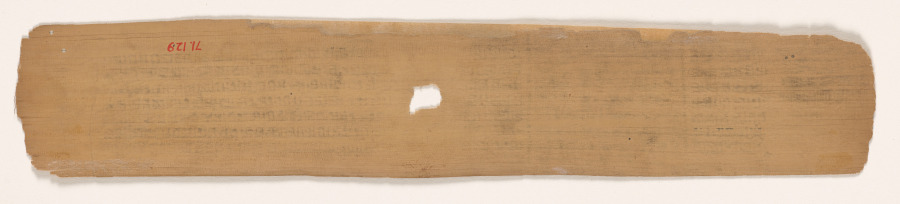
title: Rishabha enthroned, folio 1 (verso) from a Yoga-shastra of Hemachandra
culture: Western India, Gujarat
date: c. 1275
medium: Gum tempera and ink on palm leaf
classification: Painting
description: The first to achieve liberation, according to followers of Jainism, is the golden Jina named Rishabha. He is shown seated in glory on the first page of a Sanskrit text on yoga and meditation. This manuscript begins on the verso; the recto was left blank.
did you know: The small bull in the middle of his throne identifies him as Rishabha, which means "bull" in Sanskrit.